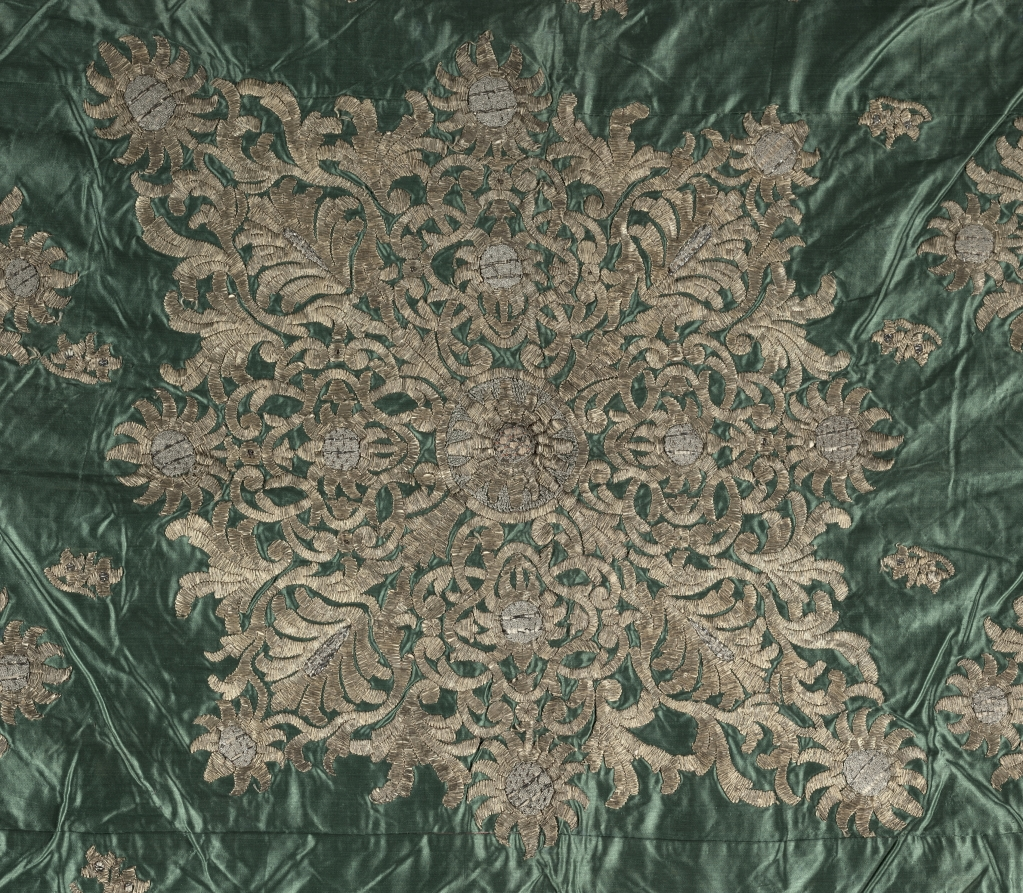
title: Gold-Thread Embroidered Cover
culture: Turkey, Ottoman period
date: 1800s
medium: silk, gilt-metal, silver-metal, paper, cotton padding; satin weave, embroidery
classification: Embroidery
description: Silk fabrics embroidered with gold thread appear to have ranked second only to gemstone-embellished textiles. Both were more prestigious than brocaded silks, which are more numerous. Embroidery was an essential component of daily life because it served innumerable covering functions. In this vibrant example with European influence, blossoming plants and foliate motifs embellish the field and border. Gold, silver, and silk thread cover paper templates which are secured with thread raised from underneath, called couching. The padded blossoms are covered with several types of silver thread for dazzling effects in a style popular during the 18th and 19th centuries at the imperial Topkapi Palace in Istanbul as well as provincial centers.